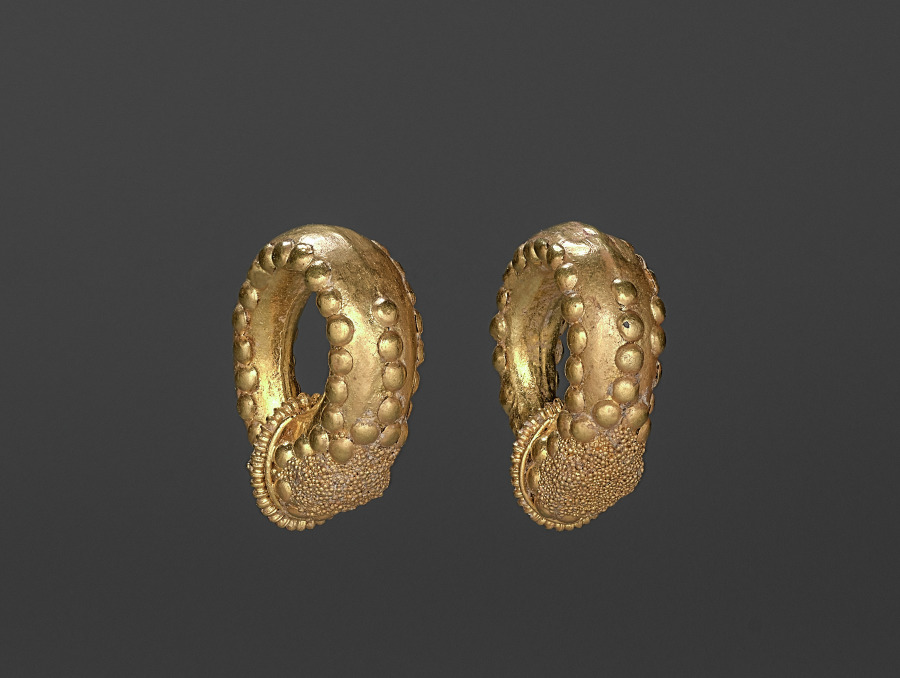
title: Pair of Earrings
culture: Etruscan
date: 300s BCE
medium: gold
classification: Jewelry